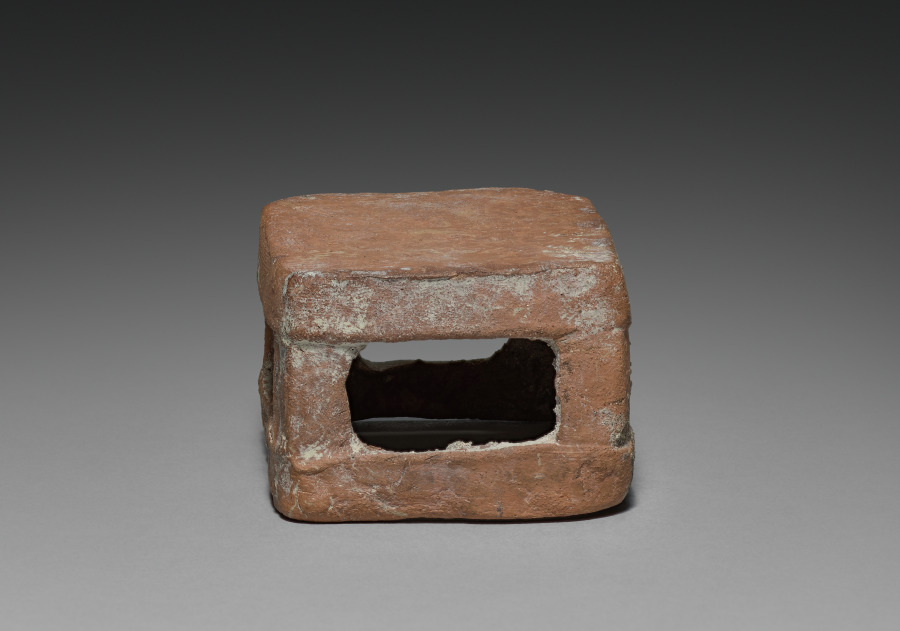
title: Seated Lord with Removable Headdress: Stool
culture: Mesoamerica, Maya, probably Jaina Island, Late Classical period, 7th-9th century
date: 600–800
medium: ceramic and slip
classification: Ceramic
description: The major Maya grave offerings on Jaina Island were ceramic figurines that depict deities and humans in a variety of roles. The stool belongs to a seated figure who represents a male, perhaps another warrior, who wears a huge zoomorphic headdress.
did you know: It is estimated that some 20,000 people were buried on the tiny island of Jaina over a 500-year period.